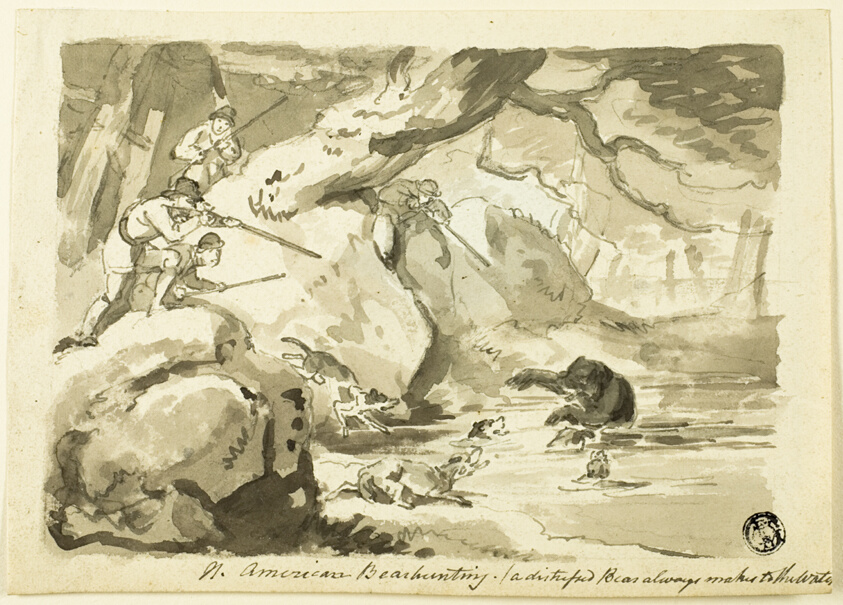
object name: Drawing and Watercolor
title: North American Bear Hunting (recto); Shell (verso)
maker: Recto attributed to Samuel Howett (English, c. 1765-1822); Verso by Unkown Artist (British, 19th c.)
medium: Pen and brown ink, with brush and brown wash, over graphite (recto), and graphite (verso), on ivory wove paper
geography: England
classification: ink or chalk wash; drawings (visual works); prints and drawing